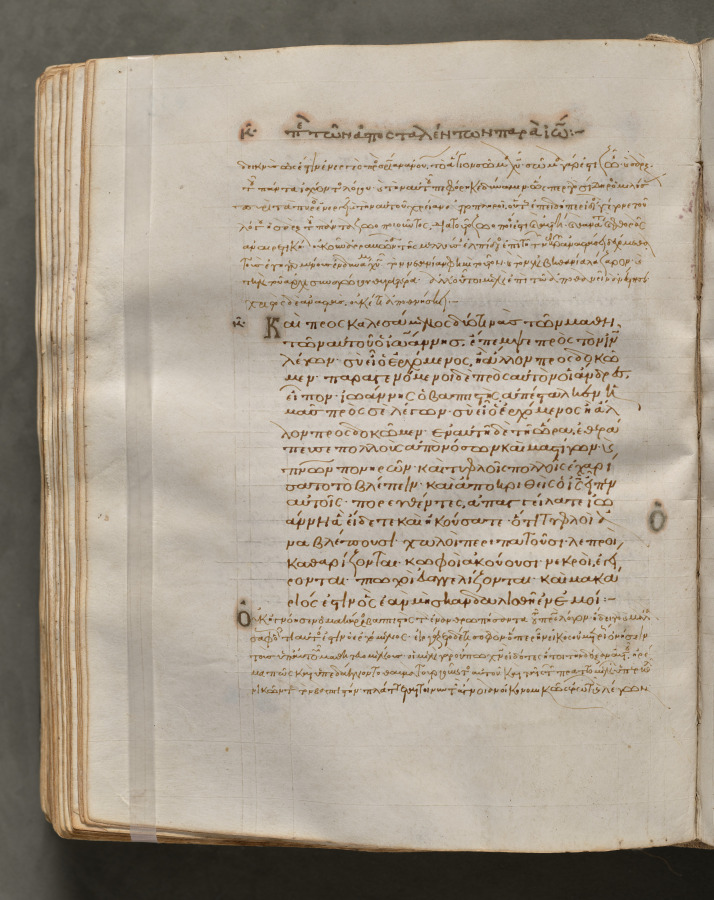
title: Text, folio 233 (verso), from a Gospel Book with Commentaries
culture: Byzantium, Constantinople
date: c. 1000–1100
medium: ink, tempera, and gold on vellum; leather binding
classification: Bound Volume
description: Each of the four gospels in this book opens on a page with brilliantly illuminated borders depicting the author of the text as well as birds—principally peacocks, symbols of the immortality of the soul—and fountains, representing the fountain of life and the salvation of the soul. This volume consists of 428 leaves with texts in Greek. Its level of sophistication suggests that it was probably written and decorated in a monastery in Constantinople.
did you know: Gospel books were carried in procession through Byzantine churches.